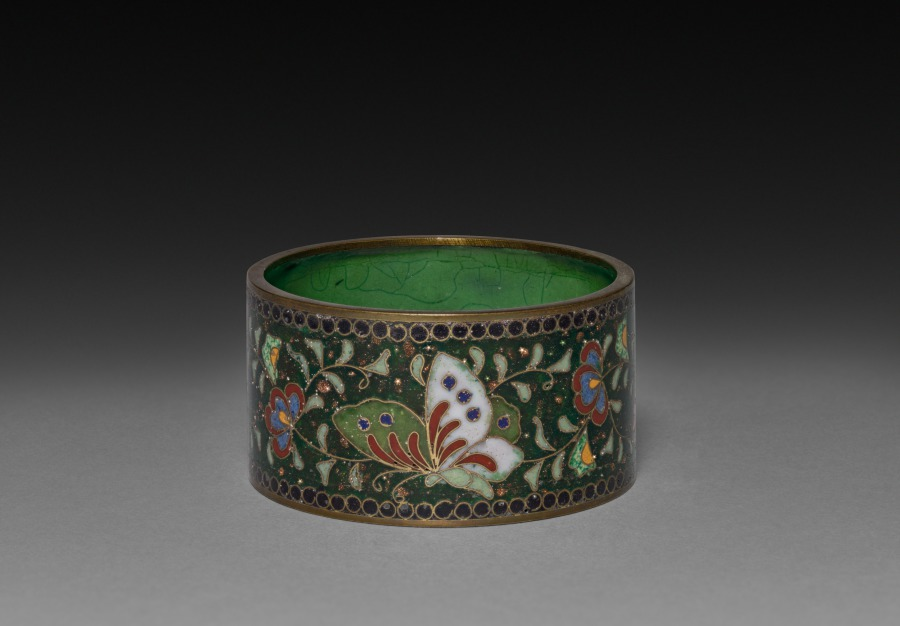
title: Napkin Ring with Butterflies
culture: Japan, Meiji period (1868–1912) or Taishō period (1912–26)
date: early 1900s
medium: cloisonne enamel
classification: Enamel